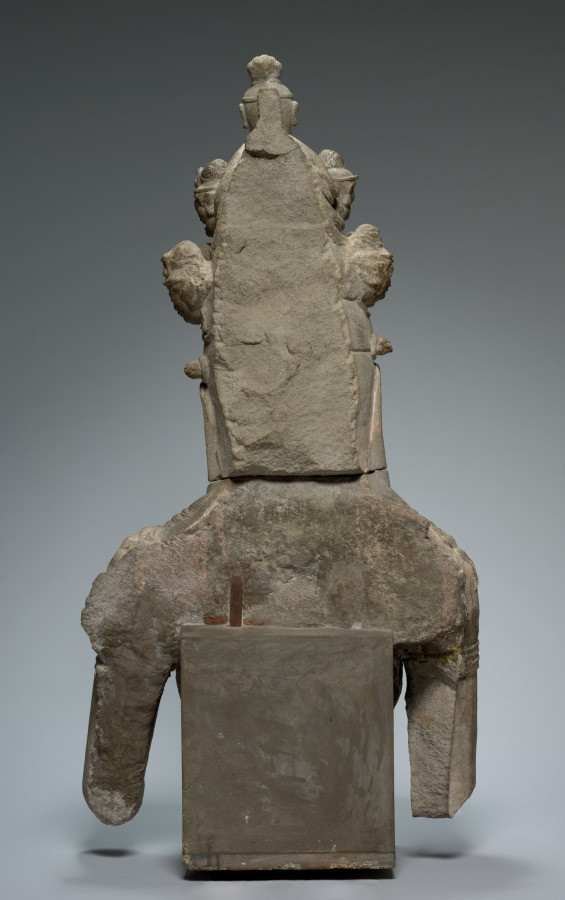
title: Eleven-Headed Guanyin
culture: China, Tang dynasty (618-907)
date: early 700s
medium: gray sandstone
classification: Sculpture